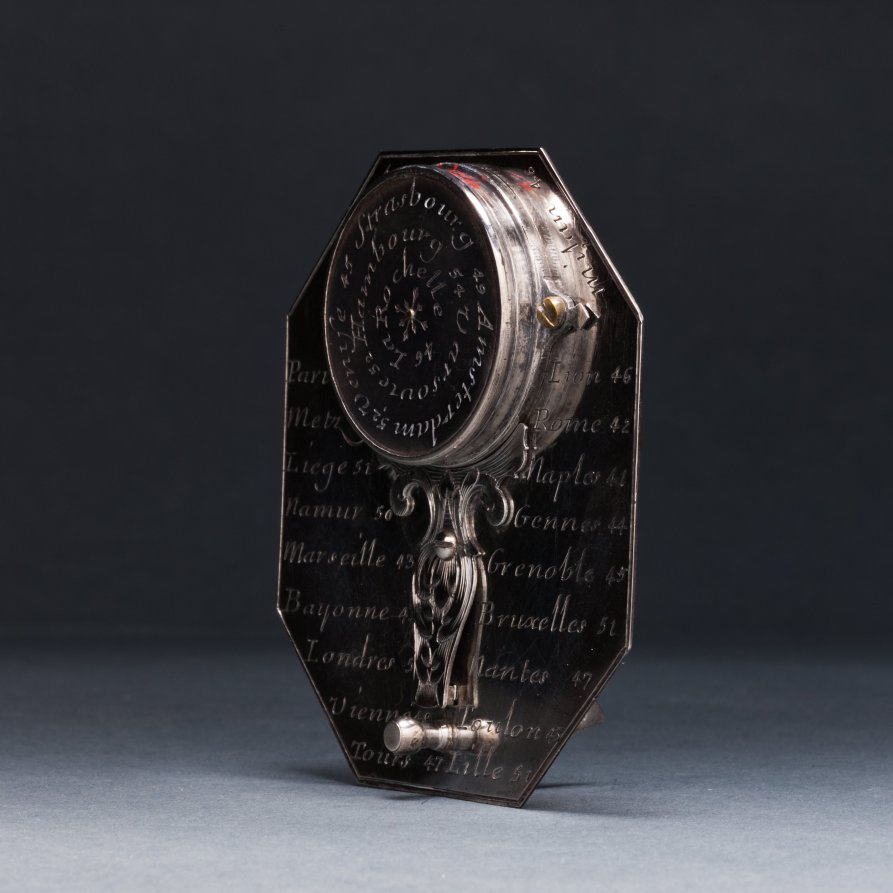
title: Butterfield Sundial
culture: France, 18th century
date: 1700s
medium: silver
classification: Silver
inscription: [Engraved signature above the compass in ribbon band]: "N. BION A Paris"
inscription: [Engraved on the face of the sundial]: “Pour 55° 4-5-6-7-8-9-10-11 50° IIII-V-VI-VII-VIII-IX-X-XI 45° 5-6-7-8-9-10-11 40° -VI-VII-VIII-IX-X-XI'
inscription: [Engraved on the other side]: "Pour 55° -8-7-6-5-4-3-2-1-0 50°-VIII-VII-VI-V-IIII-III-II-I 45°-8-7-6-5-4-3-2-1 40°-VII-VI-V-IIII-III-II-I"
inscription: [Engraved around the compass]: “NORD-OUEST-SUD-EST”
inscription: [Engraved on the back of the sundial]: “Turin 44 Milan 46 Paris 49 Lion 46 Metz 49 Rome 42 Liege 51 Naples 44 Namur 50 Gennes 44 Marseille 43 Grenoble 45 Bayonne 43 Bruxelle 51 Londres 52 Nantes 47 Vienne 48 Toulon 43 Tours 47 Lille 51”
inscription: [Engraved around the back of the compass]: “Venise 45 Strasbourg 49 Amsterdam 52 Hambourg 54 Varsovie 52 La Rochelle 46”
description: Butterfield-type sundials are characterized by their adjustable gnomons, metal flaps that cast a shadow on the dial’s face to indicate the hour, and geographical indices. This sundial has a scale adjustable between latitudes of 40° to 60° north. The latitudes of 26 European towns are engraved on its back for quick reference. With an intricately engraved silver face, it would have functioned as a fashionable traveler’s accessory.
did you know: Butterfield-style sundials were named after Micheal Butterfield, an English scientific and mathematical instrument maker who worked in Paris between 1674 and 1724.